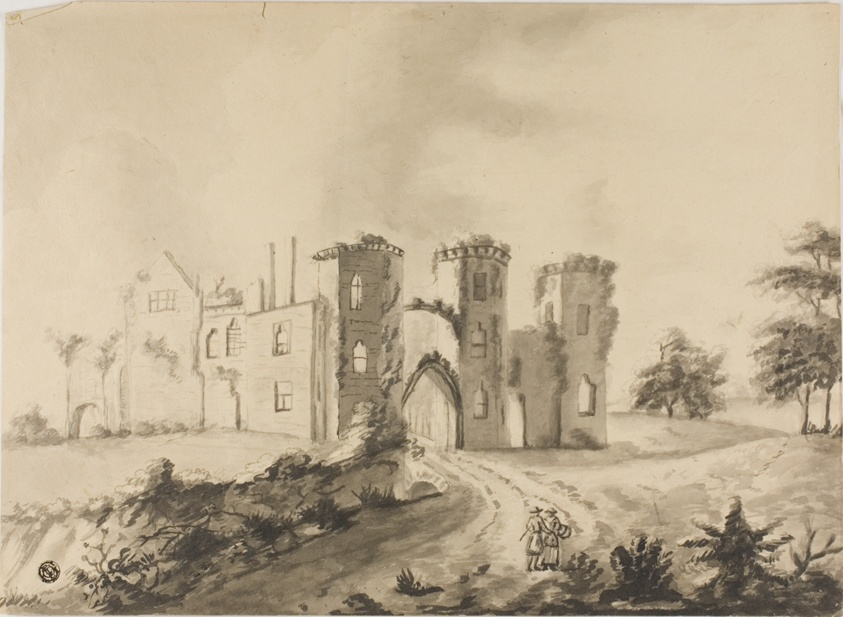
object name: Drawing and Watercolor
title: A Couple on the Path to a Fortress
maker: Unknown Artist; English or French, 1700-1799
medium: Brush and black and gray wash, with graphite, on cream wove paper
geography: England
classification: ink or chalk wash; drawings (visual works); prints and drawing